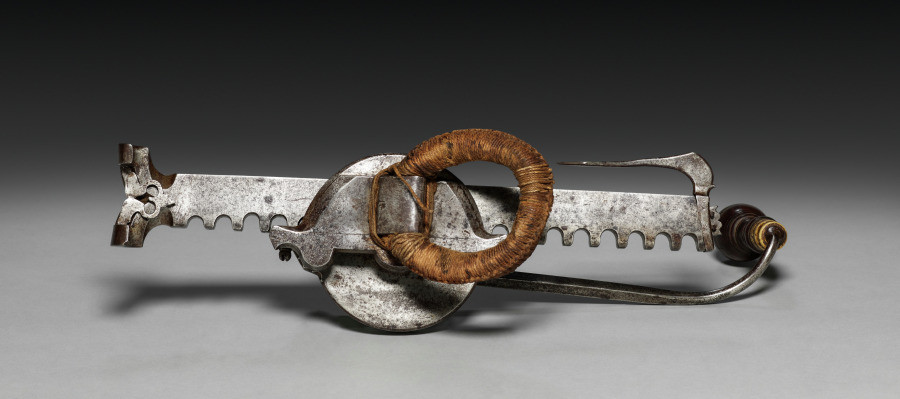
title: Cranequin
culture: Germany, Nuremberg (?), 16th century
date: c. 1580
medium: steel, flax cord, wooden handle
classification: Arms and Armor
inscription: gear case inscribed with later owner's name: CW Siball, 1665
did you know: The maker's mark says HW and may belong to Hans Wirsing, a craftsman from Nuremburg.